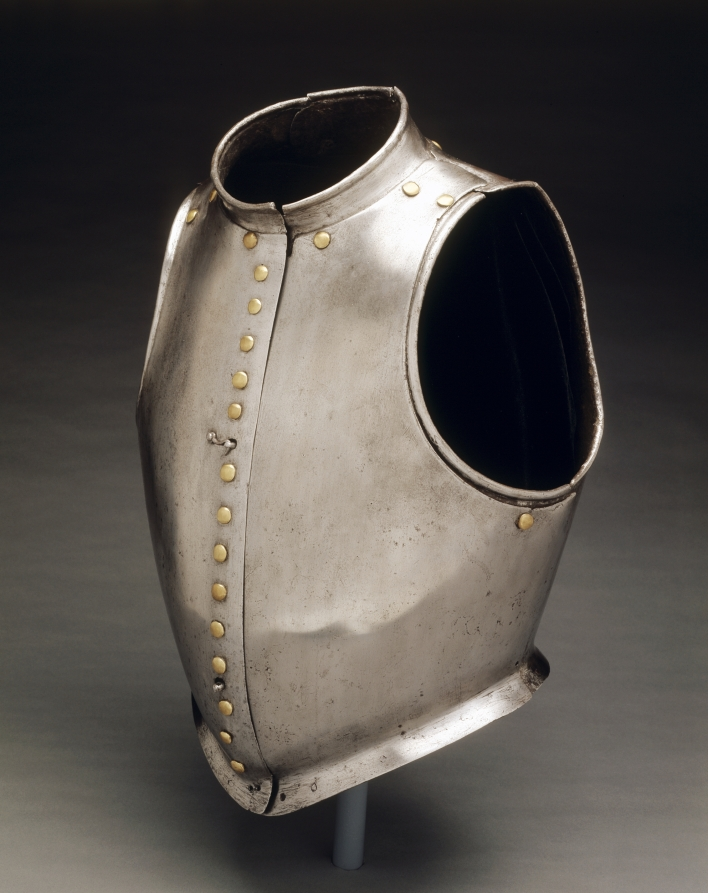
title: "Waistcoat" Cuirass (Combined Breast and Backplates)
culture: North Italy, 16th century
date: c. 1580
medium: Steel; brass rivets simulating buttons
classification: Arms and Armor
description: This cuirass is a specialized type of costume armor. In addition to protecting its owner's torso, it was clearly intended to simulate a civilian jacket, or doublet, with a row of buttons down the front. The owner would have opened it like an ordinary doublet since the two halves are hinged to a narrow backplate.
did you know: While it would provide some protection to the torso, the armor here is very light; fashion not function was the prerequisite.